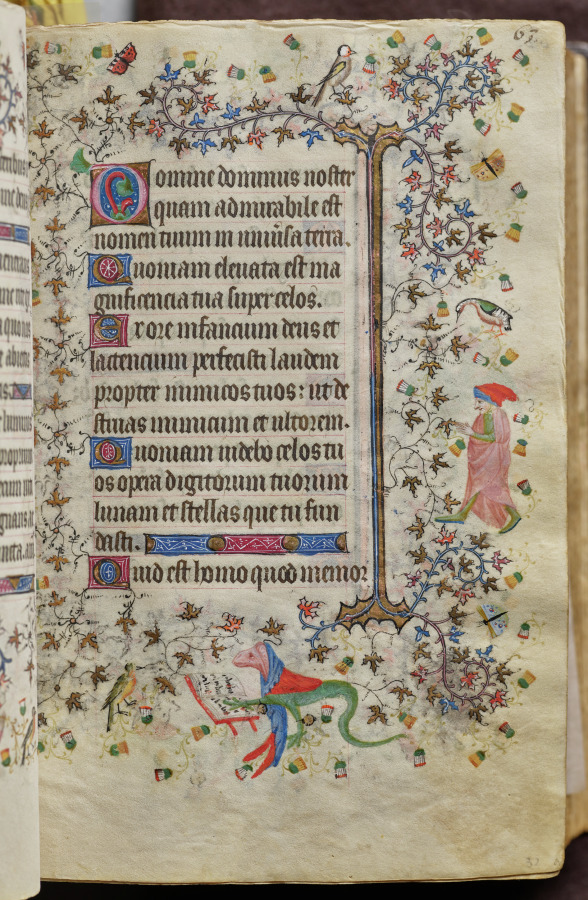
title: Hours of Charles the Noble, King of Navarre (1361-1425): fol. 32r, Text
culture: France, Paris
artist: Master of the Brussels Initials and Associates (French)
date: c. 1405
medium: ink, tempera, and gold on vellum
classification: Bound Volume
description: This precious volume was obviously highly prized by its owner, the French-born King of Navarre, who had his coat of arms painted on no less than twenty folios. Rather than directly commissioning this manuscript from a specific workshop, it seems that Charles the Noble acquired his book of hours -- perhaps ready-made for the luxury market -- while on a trip to Paris in 1404-05. A collaborative effort, six painting styles are evidenced within the pages of this codex, those of two Italians, two Frenchmen, and two Netherlanders. The painter who was responsible for the planning and decoration of the book, and who produced seventeen of the large miniatures, was a Bolognese artist known as the Master of the Brussels Initials. His principal assistant, responsible for most of the borders, was a Florentine who signed his name "Zecho" da Firenze on folio 208 verso.